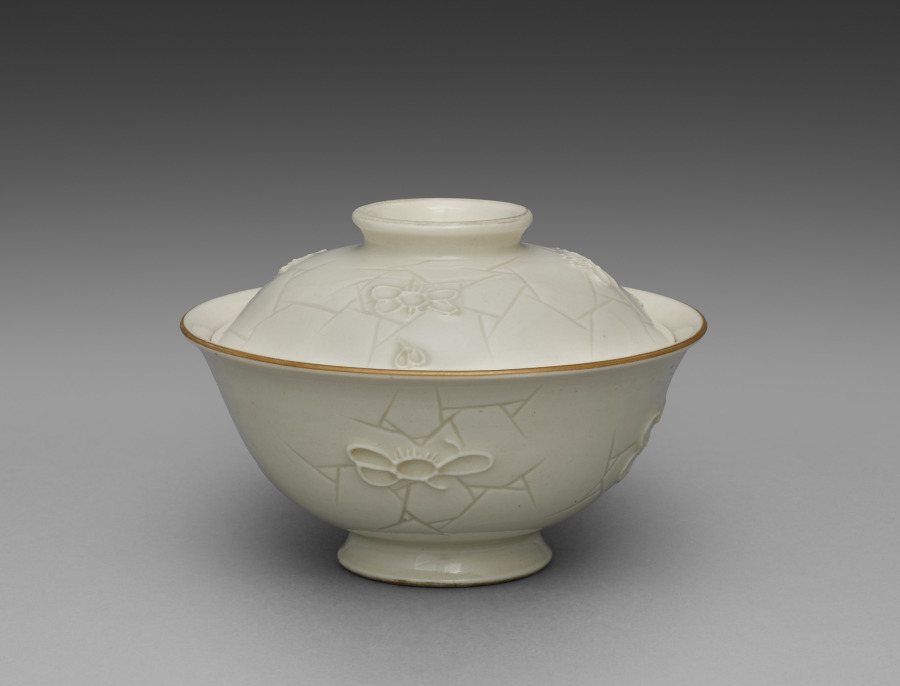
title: Covered Bowl from Dining Set with Plum Blossoms and Cracked-Ice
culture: Japan, Meiji period (1868–1912)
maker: Seifū Yohei II (Japanese, 1844–1878)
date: c. 1875–78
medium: Porcelain with molded designs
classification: Ceramic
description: Each item in this set has a delicate low-relief design of flowering plum branches over scattered, intersecting lines meant to resemble the cracked-ice surface of a frozen body of water and is signed on the base in gold pigment. While Yohei II produced many fine works in underglaze blue, like those produced by Kiyomizu Shichibei, he also made works in quite different styles later in his career, from the early 1870 s. In 1873, he was appointed purveyor to the Industrial Center of Kyoto Prefecture, a designation associated with Kyoto’s efforts to reach an international market through the port of Kobe; and from 1875 until his death, he was involved in national-level projects to present Japanese ceramics across the world. It was during this period that Yohei III was apprenticed to Yohei II, and it has been suggested that this set may in fact be an early example of Yohei III’s work, which he signed with his teacher’s name. Decorated with flowers resembling Japanese textile motifs, the set calls to mind the design of Yohei II’s pair of vases with plum blossoms in the Victoria and Albert Museum. Here, the elaborate trees created for a formal public exhibition setting have been translated into the approachable blossoms of the genteel domestic environment. While the designs are consistent across the pieces, each raised flower petal and pistil and each incised line in the ice was done by hand, so the cups, bowls, and dishes are similar yet unique. The bottoms of two boxes once identified the set’s owner, but the information has been deliberately obscured with black ink. However, inscriptions still visible appear to indicate two occasions, once at the end of July 1886 , and once again in June 1916 , when parts of the set were requested from Hokura in Niigata Prefecture. The location corresponds to a neighborhood in the present-day city of Jōetsu. The surname Tsuji 辻 also appears on a paper tag affixed to one of the box cloths. Future research may possibly reveal more about their provenance. A vase by Yohei III in a private collection combines the formal grandeur of the Yohei II vases in the Victoria and Albert Museum with the gentler design of this dining set, placing flowering plum trees against soft, scalloped-edge clouds resembling those in golden screens.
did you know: The dining wares have a creamy white coloration that the four boxes containing them identify as Korean in style.